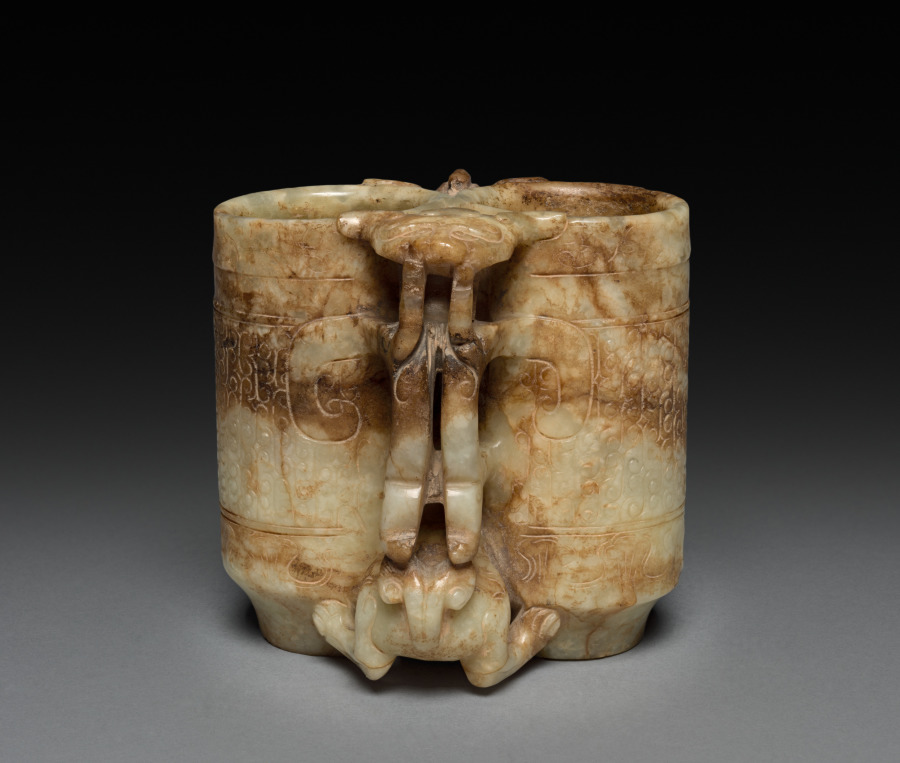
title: Champion Vase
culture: China, Song dynasty (960-1279) - Ming dynasty (1368-1644)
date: 960– 1279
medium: jade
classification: Jade